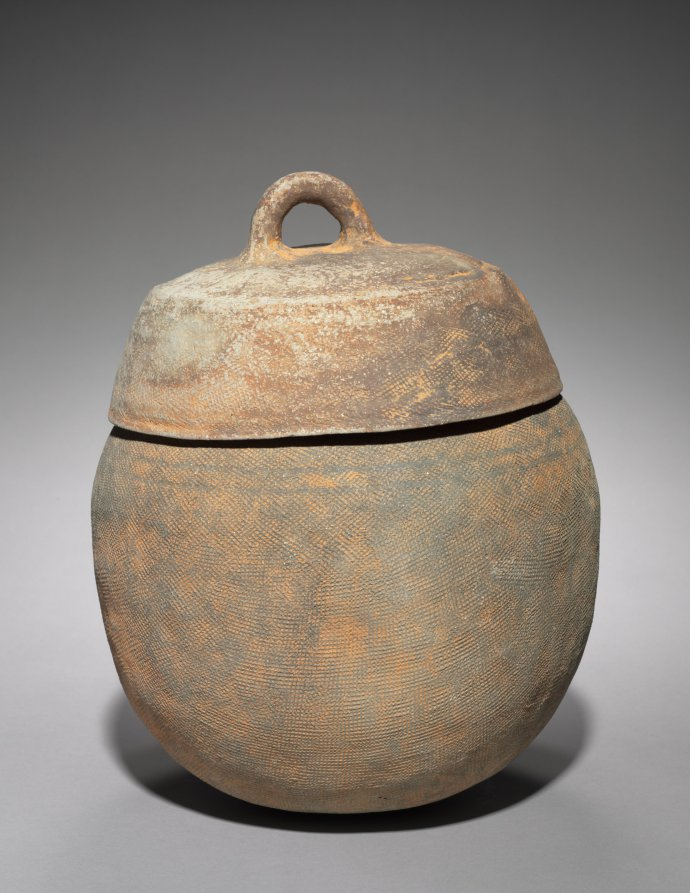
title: Jar with Loop Handle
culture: Korea, Baekje kingdom (18 BCE–660 CE)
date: 200s–300s CE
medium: earthenware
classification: Ceramic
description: Closed kilns built on hillsides became widely used for producing this type of pottery vessel in Korea during the Three Kingdoms period. Both its gray color and shimmering glaze are the result of the reduction of oxygen in the closed kiln chamber. The pounding technique (tanal in Korean) on the surface strengthened the clay body, leaving behind a geometric pattern.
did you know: The pounding technique (tanal in Korean) on the surface strengthened the clay body.